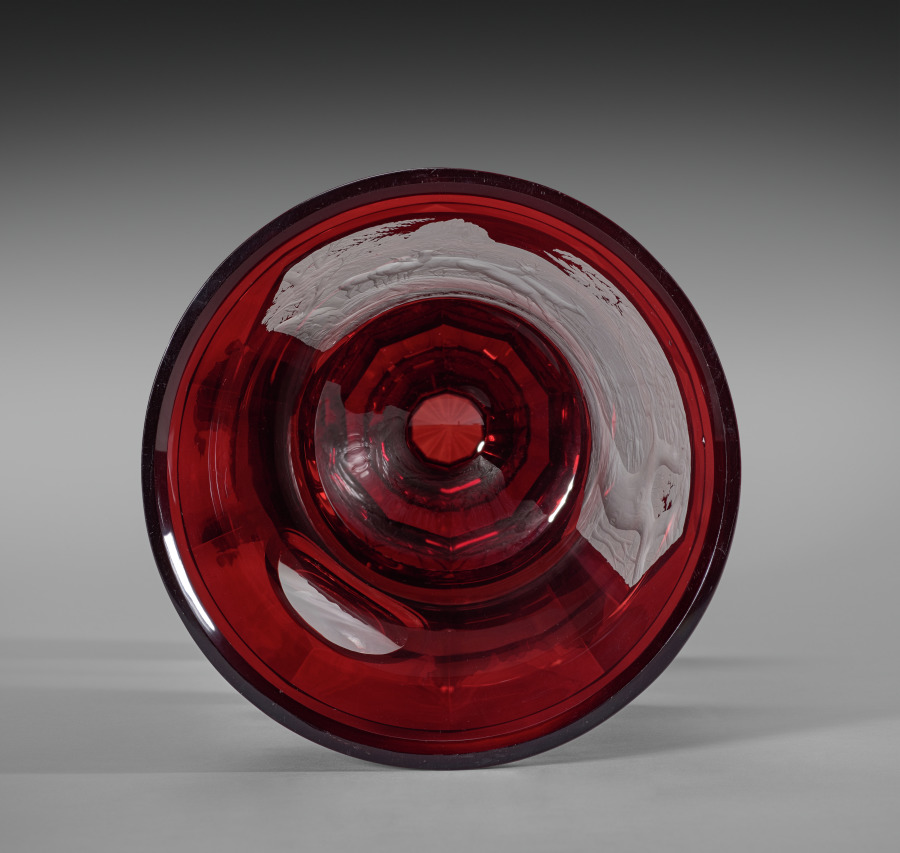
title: Cup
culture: Bohemia, 19th century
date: mid-1800s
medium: ruby glass with engraved decoration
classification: Glass